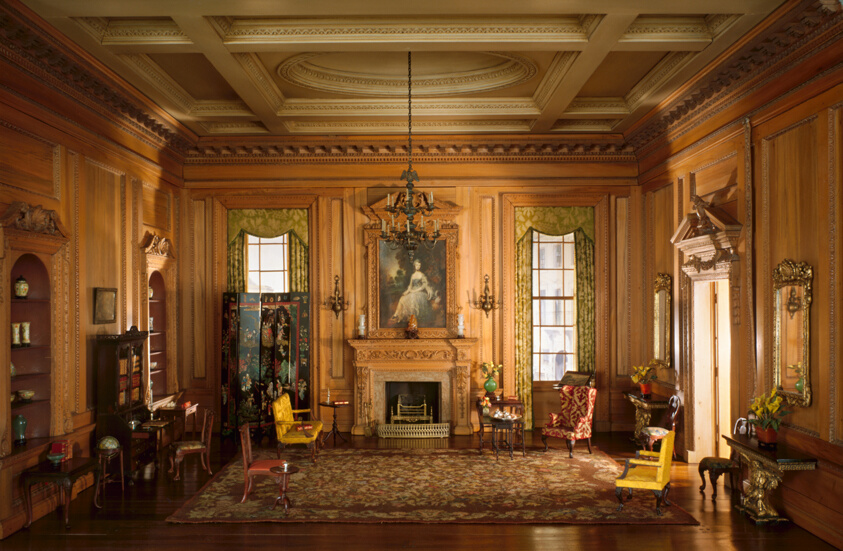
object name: Miniature room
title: E-7: English Drawing Room of the Early Georgian Period, 1730s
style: georgian, european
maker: Designed by Narcissa Niblack Thorne; American, 1882-1966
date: c. 1937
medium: Miniature room, mixed media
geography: United States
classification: thorne rooms; miniature